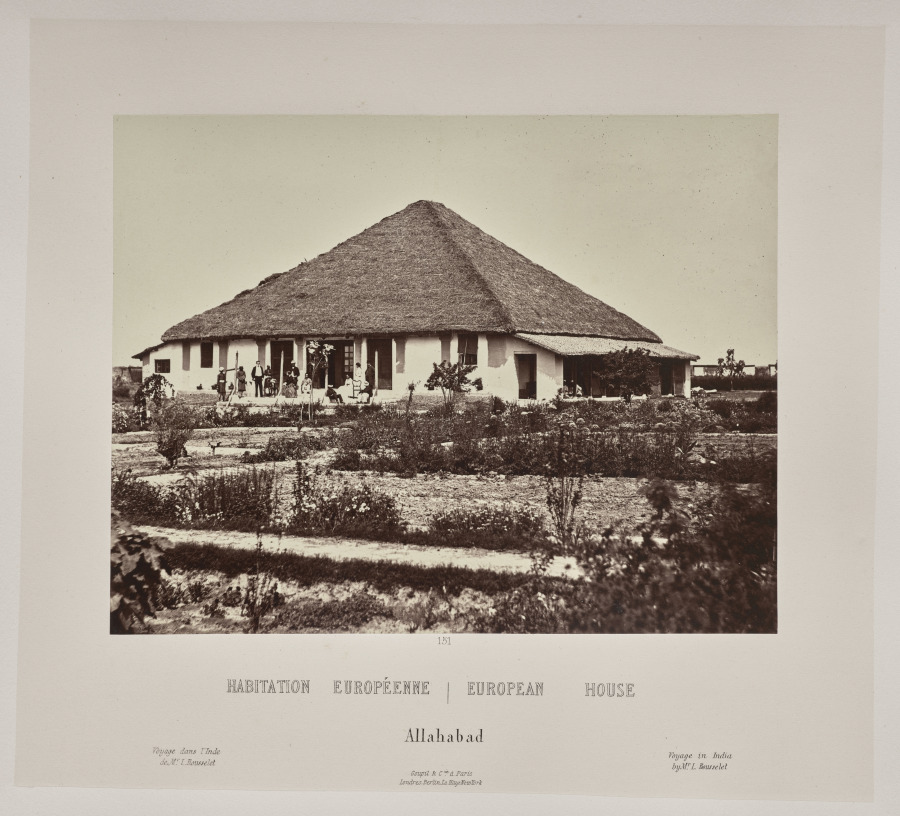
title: European House, Allahabad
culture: France, 19th century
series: India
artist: Louis-Théophile Marie Rousselet (French, 1845–1929)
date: 1865–68, published 1869–70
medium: Albumen print from glass plate negative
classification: Photograph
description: Concerned that his drawings did not do justice to the splendor of India’s monuments, Rousselet learned photography in India that year, a remarkable accomplishment. He proved to be a talented photographer with a sophisticated sense of composition. The scenes in this volume sweep across sites of Sultanate, Rajput, and Mughal power in northern India, from the sacred Hindu city of Varanasi on the Ganges River to Alwar in Rajasthan. Also included are several scenes of industry and portraits of Indian rulers.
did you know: Louis Rousselet described himself as a “scientific traveler” when he went to India alone at age 18 in 1863 and stayed into 1868.